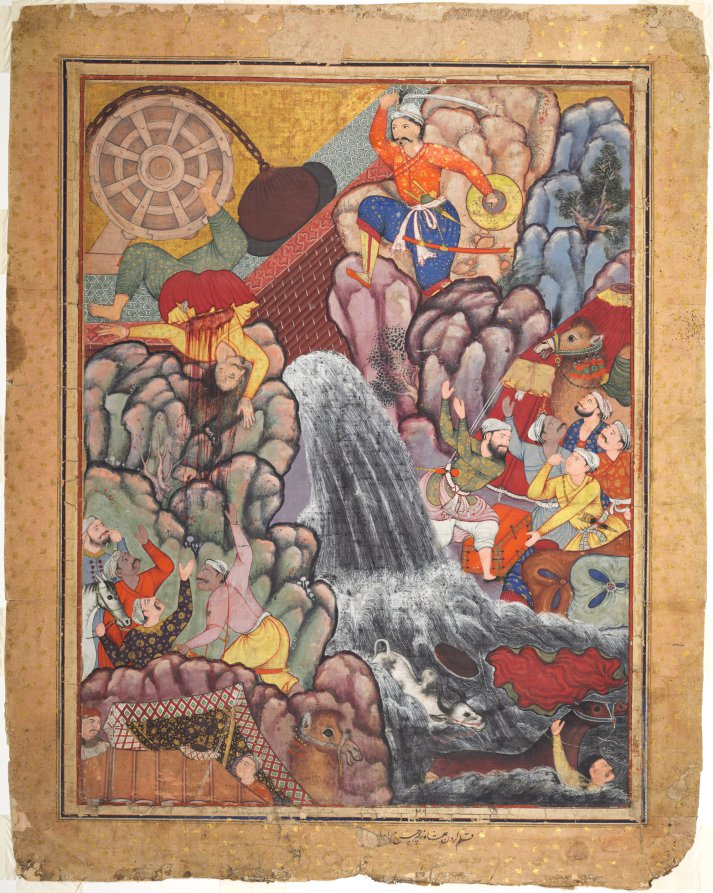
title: Alamshah cleaving asunder the chain of the wheel, from volume 11 of a Hamza-nama (Adventures of Hamza)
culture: Mughal India, court of Akbar (reigned 1556–1605)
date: c. 1560s–70s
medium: Gum tempera, ink, and gold on cotton and paper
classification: Painting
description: The hero, Alamshah the Greek, perches on a cliff above a rushing torrent of water. He has just slain the villain who raised the massive bronze plug on the dam in order to wash away the camp of Alamshah’s father, Hamza. The Hamza-nama recounts the adventures of an uncle of the Prophet Mohammed. It was the first major undertaking of the fledgling painting workshop created by Akbar. Originally in 14 volumes of 100 illustrations each, just a little more than 10 percent of the pages survive.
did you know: The title in the bottom margin is a continuation of the text on the previous page.